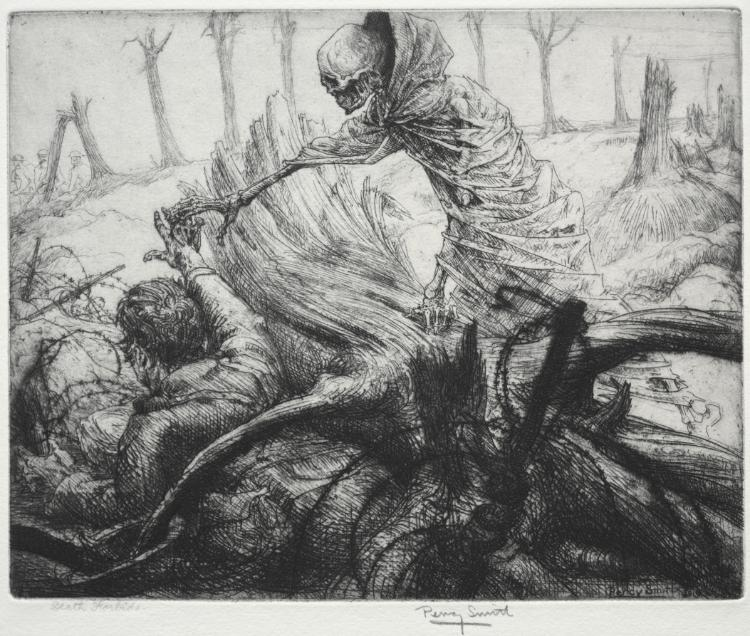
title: Dance of Death: Death Forbids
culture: England, 20th century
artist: Percy John Delf Smith (British, 1882–1948)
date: 1919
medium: etching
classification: Print